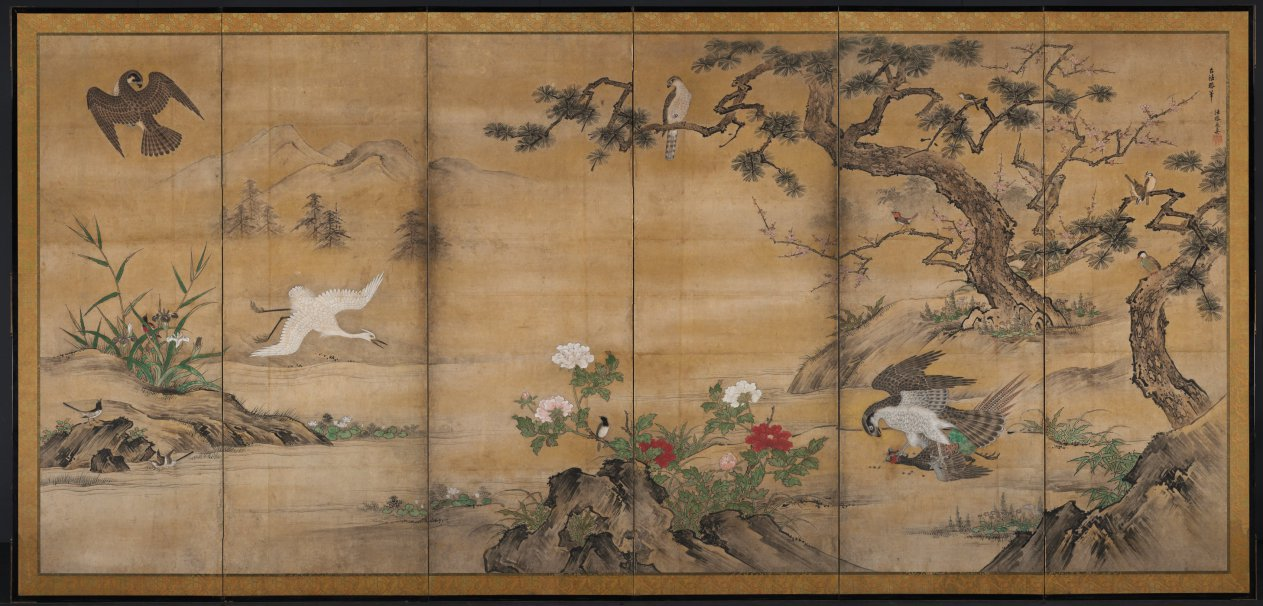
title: Birds and Flowers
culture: Japan, Momoyama period (1573–1615)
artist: attributed to Kano Shōei (Japanese, 1519–1592)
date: late 1500s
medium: One of a pair of six-panel folding screens; ink, color, and gold on paper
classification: Painting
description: The landscape depicted in this pair of screens follows a seasonal progression from right to left, starting with the blossoming plum of early spring and ending with late autumn peonies. A variety of smaller birds are positioned throughout the scene, and a trio of swimming ducks is bracketed by early summer irises and early autumn bellflowers at the center. While some raptors (birds of prey) terrorize a pheasant and an egret (a waterfowl) to the right, a peacock and peahen converse to the left. Hawks are associated with military prowess, while the peafowl suggest cultural prestige.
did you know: Military class patrons frequently requested scenes depicting predation, such as hunting scenes that were inserted as additional subject matter in otherwise tranquil vistas celebrating flora and fauna.